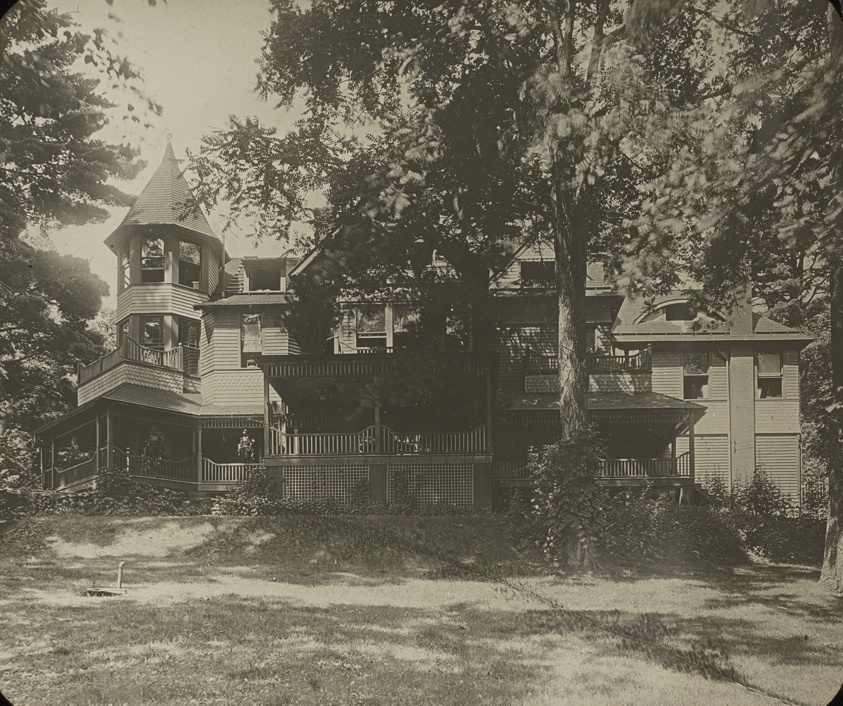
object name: Photograph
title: Oaklawn House, (East Side)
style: 19th century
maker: Alfred Stieglitz (American, 1864–1946)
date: c. 1900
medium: Lantern slide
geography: United States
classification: lantern slide (glass); negative/transparency; photography; photograph